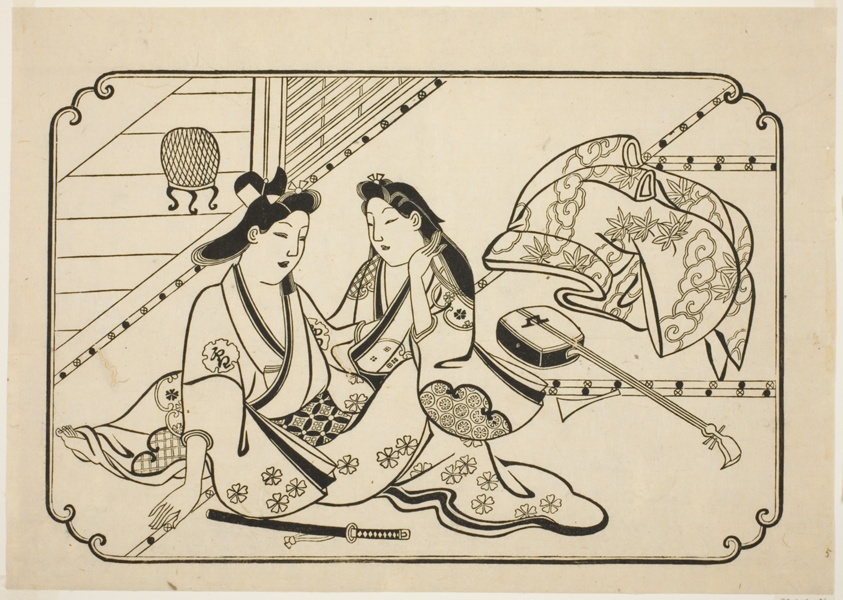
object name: Print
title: After a little music, from an untitled series of 12 erotic prints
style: Japanese (culture or style)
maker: Attributed to Hishikawa Moronobu; Japanese, (?)-1694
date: c. 1673/81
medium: Woodblock print; oban, sumizuri-e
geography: Japan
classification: woodblock print; print; asian art; woodblock